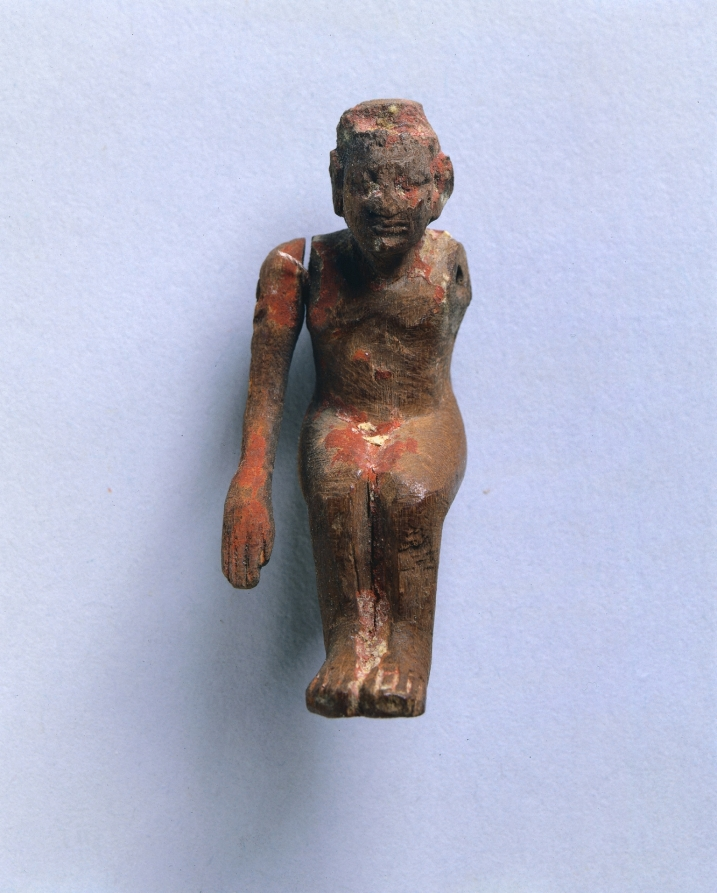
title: Model Oarsman (?)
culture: Egypt, Meir(?), Middle Kingdom (2040–1648 BCE), Dynasty 12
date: 2040–1648 BCE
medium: painted tamarisk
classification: Funerary Equipment